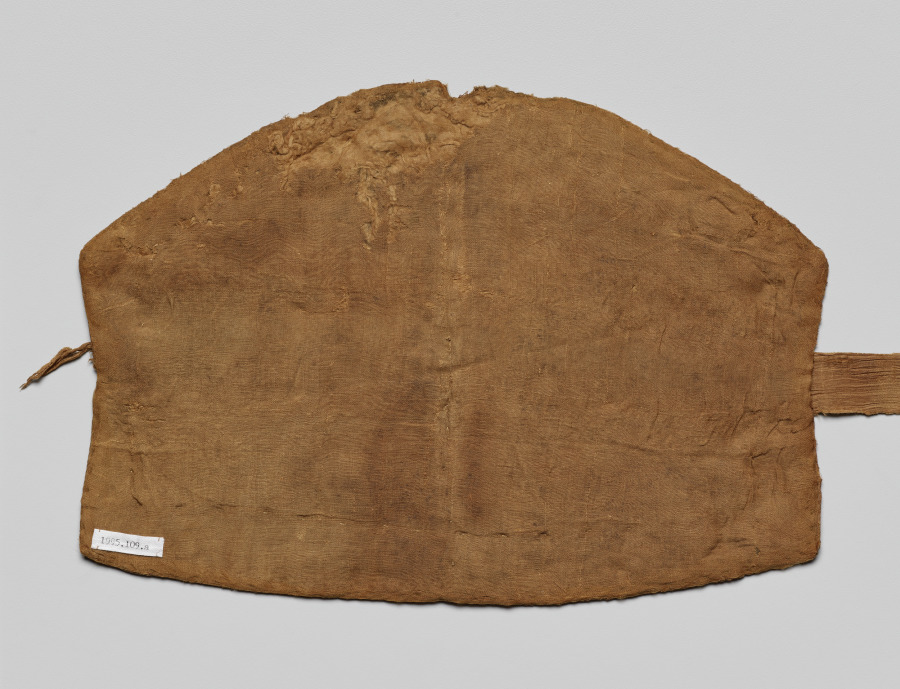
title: Headpiece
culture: China, Liao dynasty (907-1125)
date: 907–1125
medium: embroidery, silk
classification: Embroidery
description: Pair of Headpieces Embroidery; silk Liao Dynasty (907-1125) The Cleveland Museum of Art, Gift of Lisbet Holmes 1995.109.a and 1995.109.b (Cat. no. 52) These headpieces are embroidered with butterflies, birds, animals, flowers, leaves, and delicate vine scrolls. In general, the design is related to the theme of the lotus pond, best known from Liao tomb paintings. Paired ducks or geese swimming in water and looking in opposite directions seem to have become popular in the north of China before spreading further south and to Central Asia. On the other hand, recumbent animals looking back are a Central Asian image that migrated to northern China. Headpieces of this shape, intersected by two bands and secured by ties, have a long history in northern China. A gold replica was found in a tomb dating as early as ad 500-550.